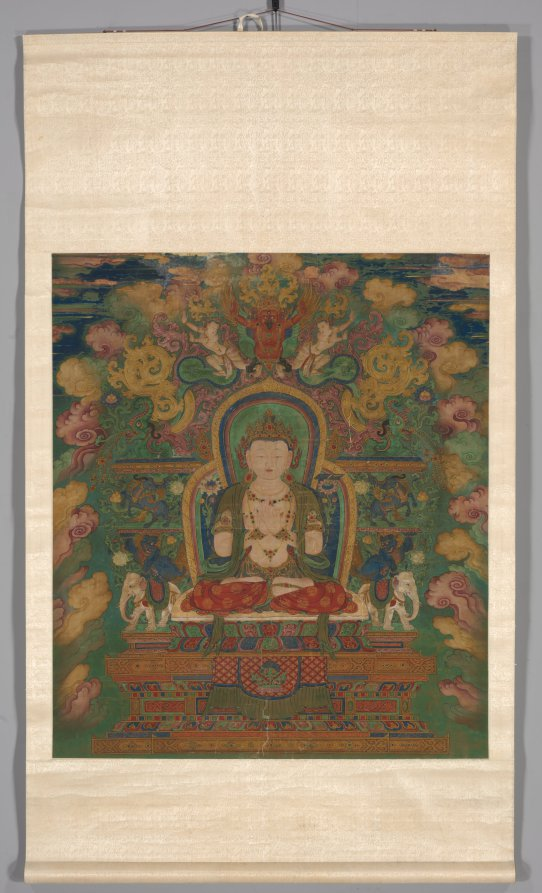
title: Manjushri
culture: China, Ming dynasty (1368–1644)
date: c. 1500–1550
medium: Hanging scroll, ink, color and gold on silk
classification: Painting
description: A Chinese artist's interpretation of an Indo-Nepalese throne surrounds the white figure of Manjushri, the bodhisattva of wisdom. Chinese textiles and jewels drape fluidly over the body, the red lower garment offering a contrast to the abundance of malachite green that dominates the composition. Swirling clouds of variegated hues around the periphery add to the mystical, almost magical mood of this iconic figure. His hands are in the gesture of imparting the Buddhist teachings, while his posture and expression reveal that wisdom can be perceived through the practice of yogic meditation.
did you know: The book on the lotus by the figure's left shoulder identifies him as Manjushri, the bodhisattva of wisdom.